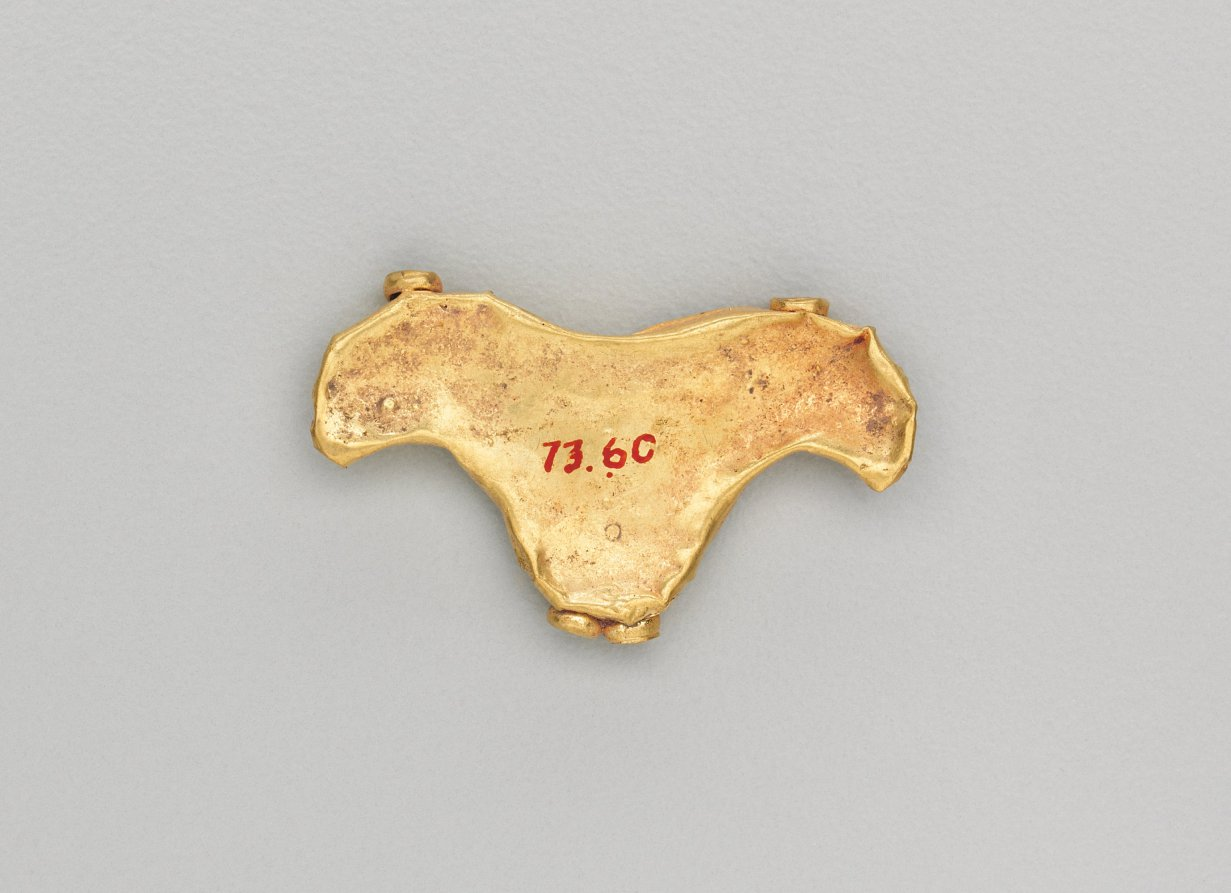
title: Set of Pendants Ending in a Bull's Head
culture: India, Shunga period (185–78 BCE)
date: 185–72 BCE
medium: gold repoussé with granulation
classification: Jewelry